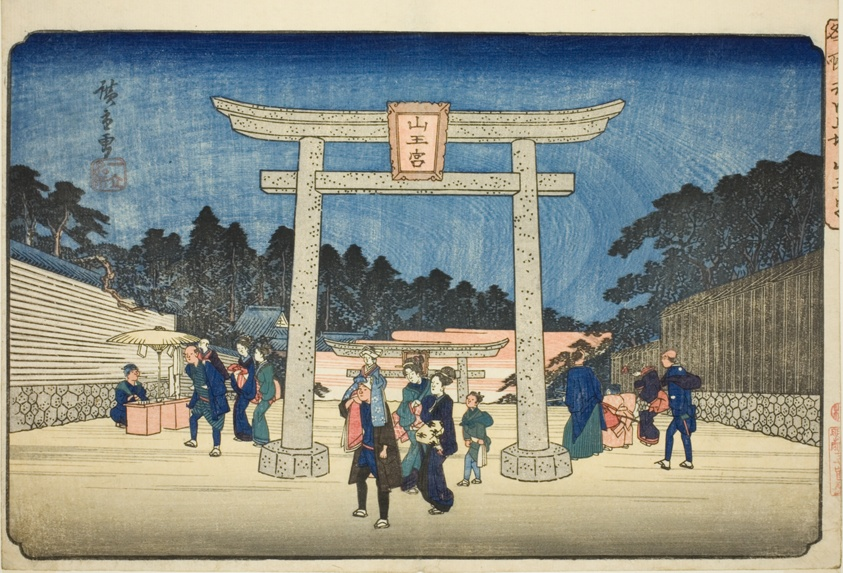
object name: Print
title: Sanno Shrine at Nagatababa (Nagatababa Sannogu), from the series "Famous Places in the Eastern Capital (Toto meisho)"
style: Japanese (culture or style)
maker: Utagawa Hiroshige 歌川 広重; Japanese, 1797-1858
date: c. 1832/38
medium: Color woodblock print; oban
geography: Japan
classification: woodblock print; print; asian art